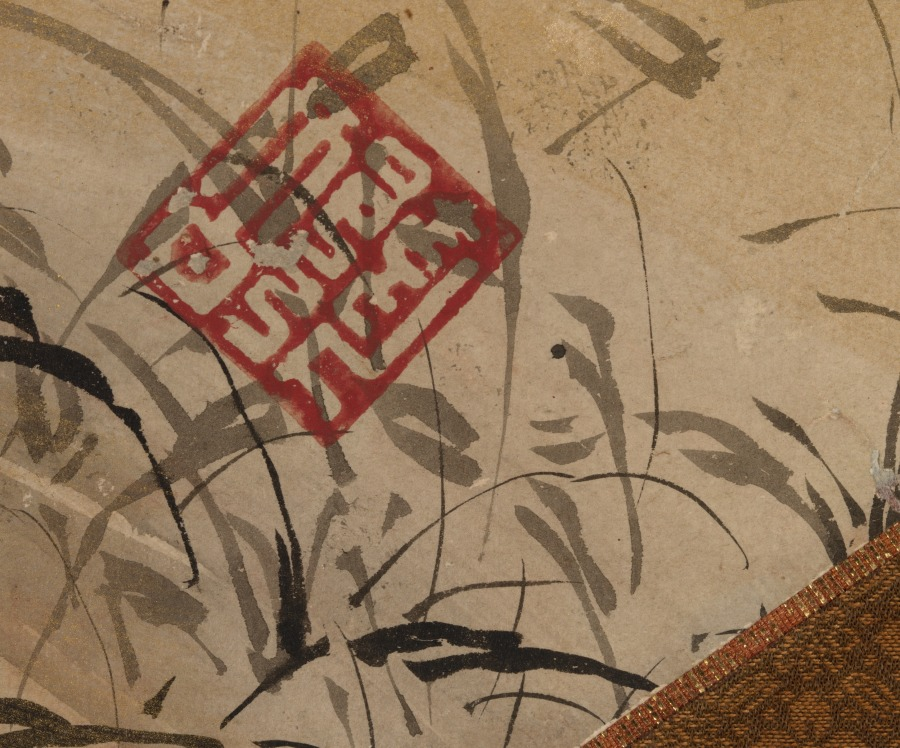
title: Duck in Flight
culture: Japan, Muromachi period (1392–1573)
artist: Shikibu Terutada (Japanese, active mid-1500s)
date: mid-1500s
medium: fan painting mounted as hanging scroll; ink and gold on paper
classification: Painting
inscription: artist's seal in lower right.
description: These three fan-shaped paintings, now mounted as individual hanging scrolls, were once part of a set of 20 mounted on a folding screen. They portray the Chinese subjects, from left to right, of the scholar-official Pan Lang, Hanshan reciting his poetry to Shide, and a duck in flight above reeds. Pan Lang grew so fond of the mountain in his place of exile that when he was ordered back to the capital, he rode backward on his donkey so he could see it until it receded into the distance. Hanshan and Shide worked in the kitchen of a Zen monastery, but were actually reincarnations of the bodhisattvas Manjushri and Samantabhadra. The combination of a mandarin duck and reeds may have signified a level of attainment in Chinese civil service exams. All three paintings bear the seal of the Kantobased artist Shikibu Terutada. Shikibu was familiar with Kano school painting, but he also modeled his early style after that of the prominent Kanto-based Kenkō Shōkei (active about 1470–after 1523).